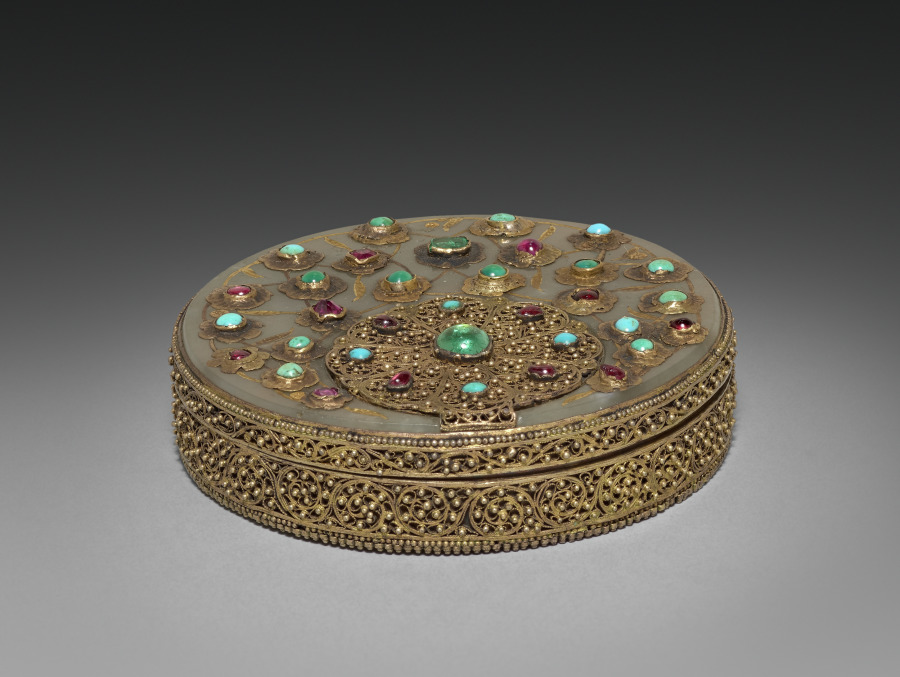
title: Box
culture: Germany ?, late 18th century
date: late 1700s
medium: enamel on copper with gilt metal mounts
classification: Miscellaneous